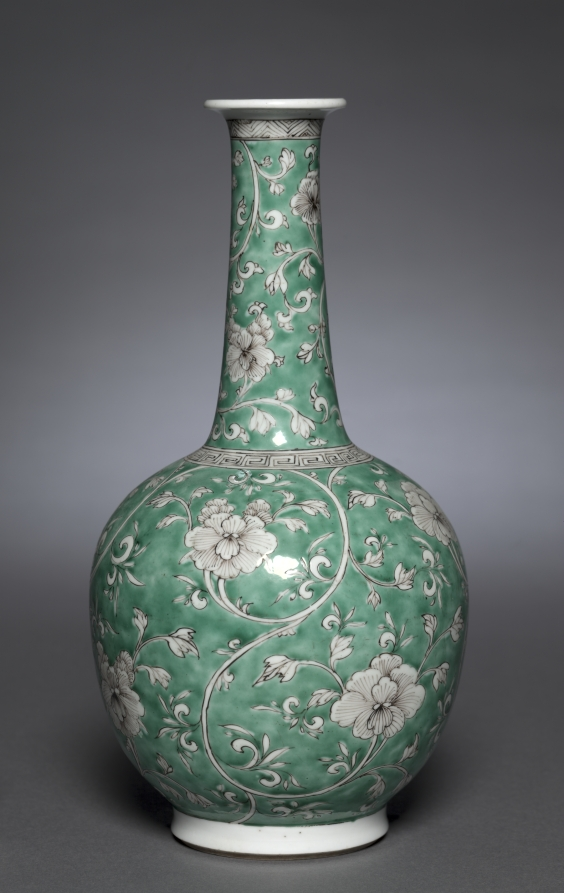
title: Bottle Vase with Floral Scrolls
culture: China, Qing dynasty (1644-1911), Kangxi reign (1661-1722)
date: 1662–1722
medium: porcelain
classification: Ceramic